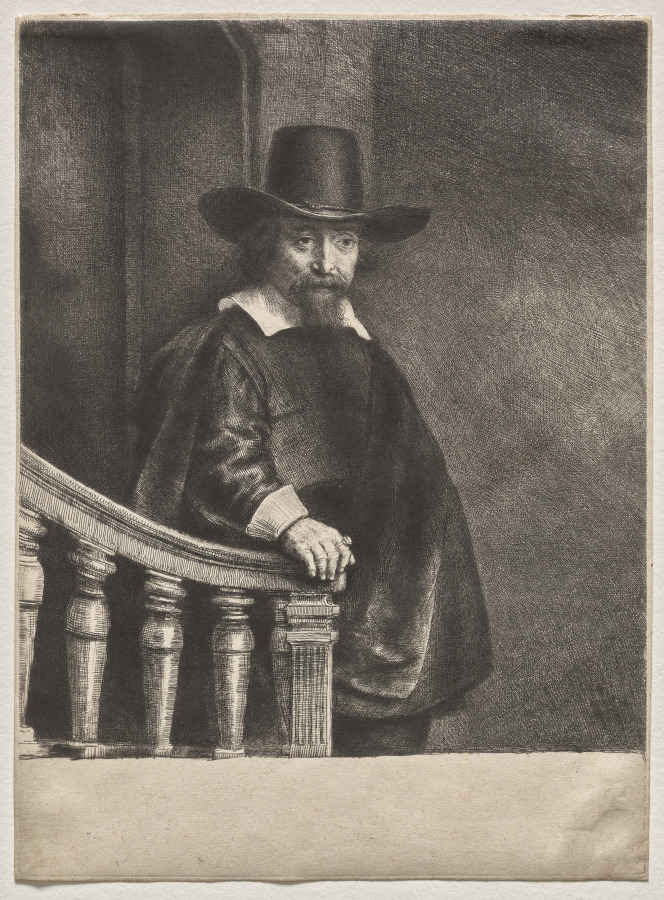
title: Ephraim Bonus, Jewish Physician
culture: Netherlands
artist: Rembrandt van Rijn (Dutch, 1606–1669)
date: 1647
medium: etching, drypoint and engraving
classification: Print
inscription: lower right, in plate (barely visable): Rembrandt f. 1647 ; VERSO, lower left, in graphite: 280 ; lower left, in graphite: 6350 ; lower left, in graphite: a 17539 ; lower left, in graphite: 17060 ; lower left, in graphite: A.H.L.-- ; lower left, in graphite: [illegible] ; lower right, in graphite: HPXV ; lower right, in pen and brown ink: 258 ; lower right, in graphite: L. ; lower right, in red chalk: 10